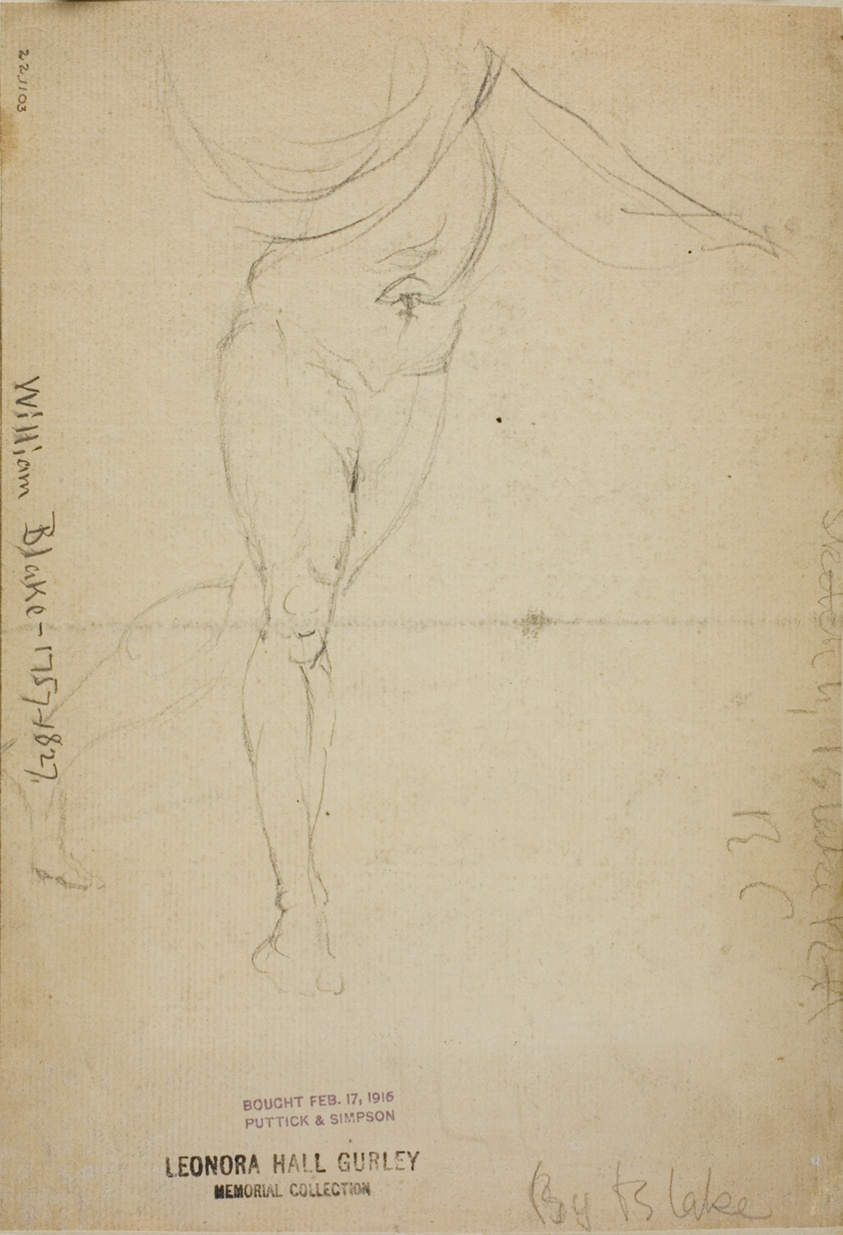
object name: Drawing and Watercolor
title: Classical Combat (recto); Sketch of Male Nude (verso)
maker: Possibly William Blake (English, 1757-1827); or Thomas Stothard (English, 1755-1834)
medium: Pen and black ink over graphite (recto), and graphite (verso), on tan laid paper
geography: England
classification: pen and ink drawings; drawings (visual works); prints and drawing